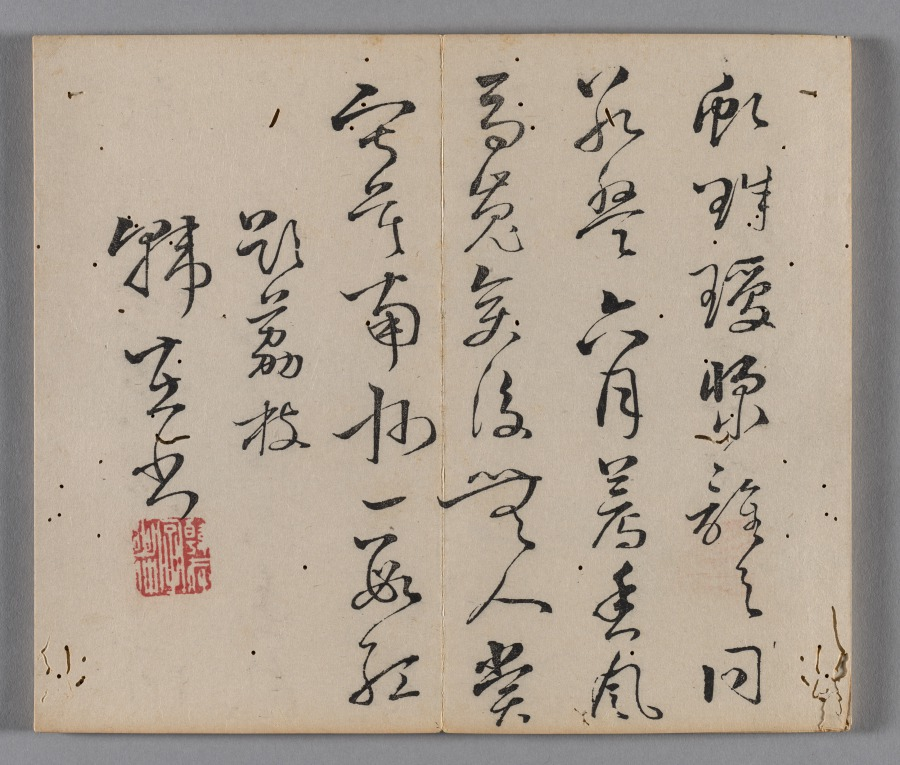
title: Ten Bamboo Studio Painting and Calligraphy Handbook (Shizhuzhai shuhua pu): Fruit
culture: China, Qing dynasty (1644-1911)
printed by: Hu Zhengyan (Chinese, c. 1584–1674)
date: 1633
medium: Woodblock-printed book; ink and colors on paper; first edition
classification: Print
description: Color printing reached a level of perfection in the early 1600s, as seen in this Ten Bamboo Studio Collection of Calligraphy and Painting and the Mustard Seed Garden Manual of Painting (printed 1679 and 1701). The painterly quality, precision in registering (aligning) the woodblocks, and harmonious colors made them the most successful color print editions in Chinese history. Both editions were printed and compiled in Nanjing, spread nationwide, and had a great impact on the arts in Japan and Korea.